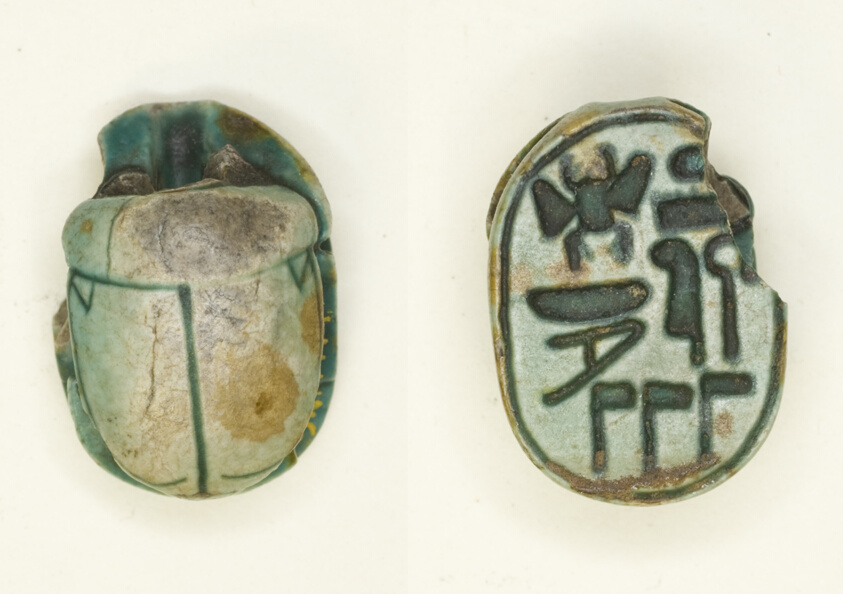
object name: Costume and Accessories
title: Scarab: Menkheperra (Thutmose III)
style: new kingdom, ancient, eighteenth dynasty, egyptian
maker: Egyptian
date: New Kingdom, Dynasty 18, Reign of Thutmose III (about 1479–1425 BCE)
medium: Glazed steatite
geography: Egypt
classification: scarab; ancient art; costume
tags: scarab beetle, kings, king, insects, Hieroglyphs